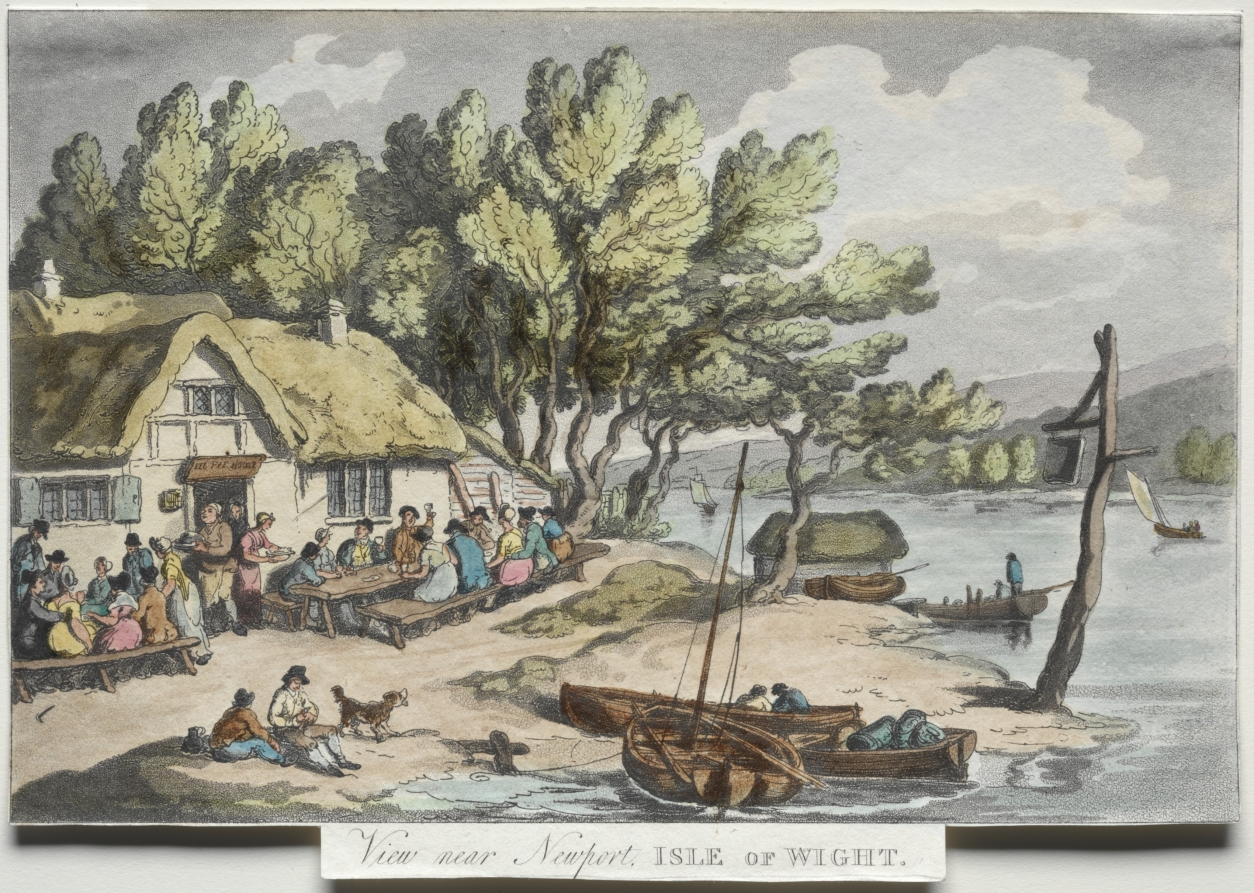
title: Rowlandson's Sketches from Nature: View near Newport, Isle of Wight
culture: Engalnd, early 19th Century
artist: Thomas Rowlandson (British, 1756–1827)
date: 1809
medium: etching, hand colored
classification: Print